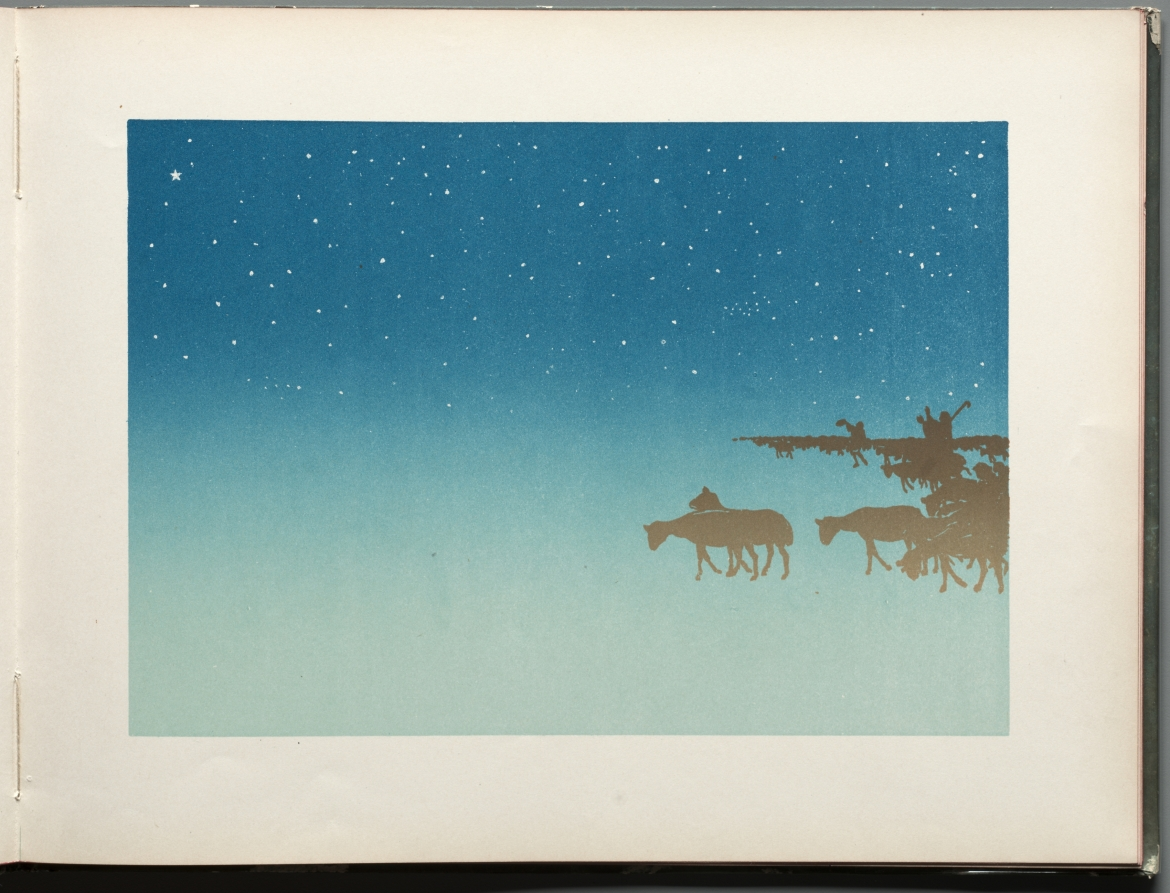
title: The Progress of the Stars: L' Etoile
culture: France, 19th century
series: Bound Volume illustrating the poetry and music of Georges Fragerolle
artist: Henri Rivière (French, 1864–1951)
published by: C. Marpon & Flammarion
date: 1890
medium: 18 color lithographs in a Bound Volume illustrating the poetry and music of Georges Fragerolle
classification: Bound Volume